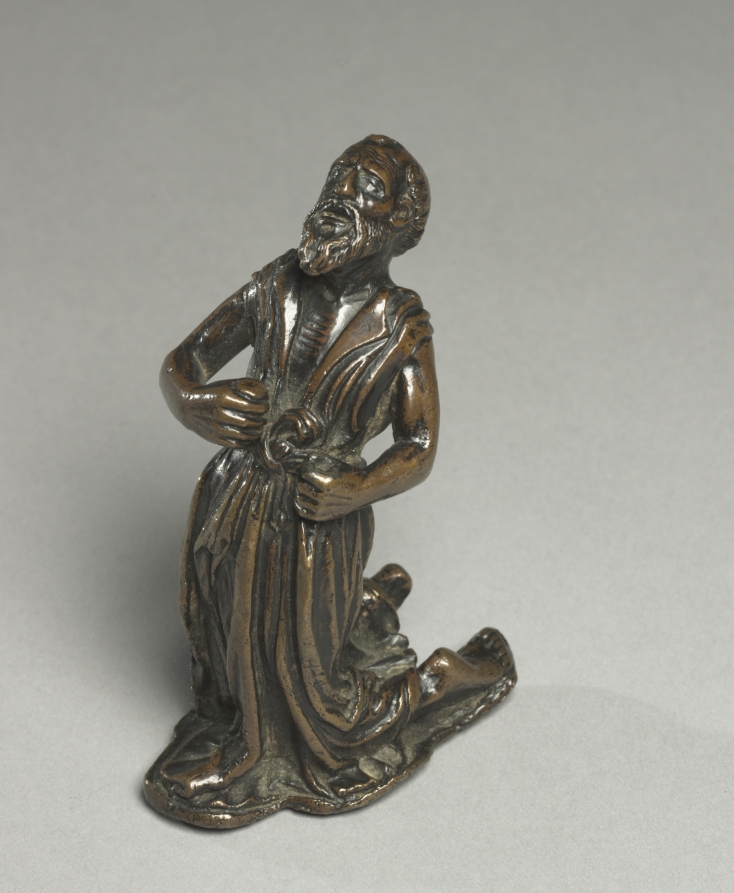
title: Kneeling Saint Jerome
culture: Italy, Ravenna, 16th century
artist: workshop of Severo da Ravenna (Italian, c.1496–c.1543)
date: c, 1525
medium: bronze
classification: Sculpture